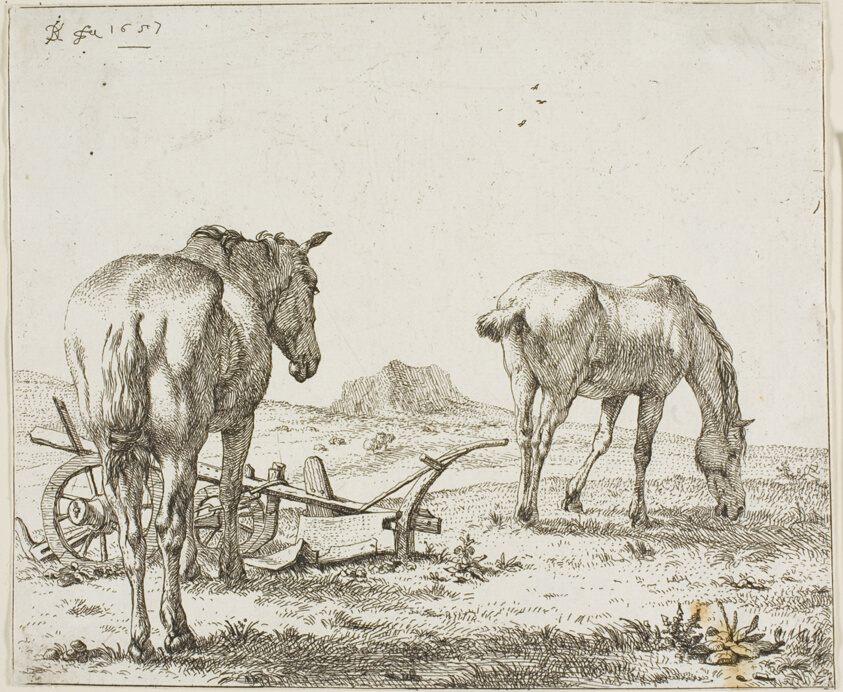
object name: Print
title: Two Horses by a Plough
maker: Karel Dujardin (Dutch, c. 1622-1678)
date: 1657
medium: Etching on paper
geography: Holland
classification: etching; print; prints and drawing